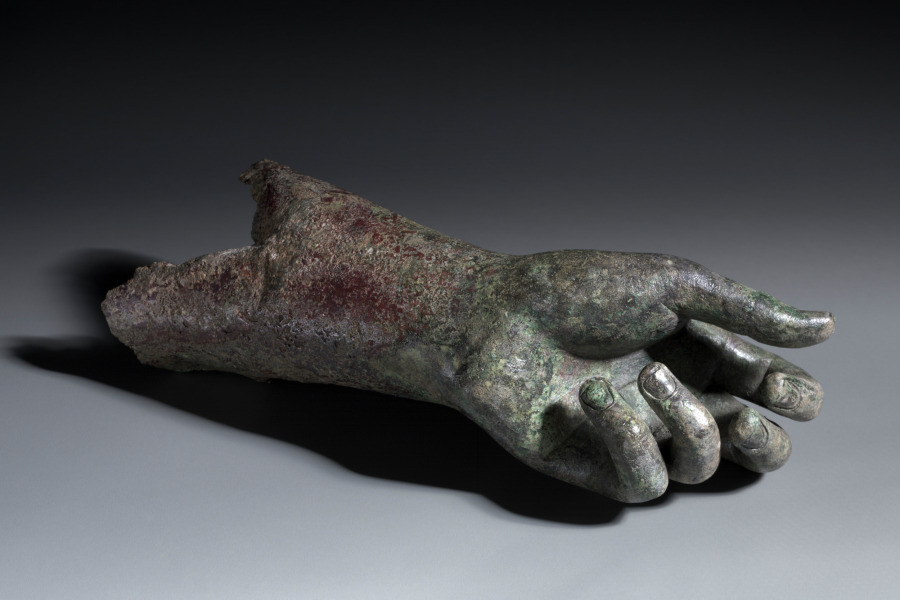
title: Detached Left Forearm and Hand of the Cleveland Apollo: Apollo Sauroktonos (Lizard-Slayer) or Apollo the Python-Slayer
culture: Greece, Athens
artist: attributed to Praxiteles (Greek, Athenian, c. 400–330 BCE)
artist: or Follower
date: c. 350–200 BCE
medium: bronze, copper and stone inlay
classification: Sculpture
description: Broken from the rest of the left arm some distance above the wrist, this fragment preserves much of the left forearm and the entire hand. The fingernails and folds of the palm are finely modeled, giving the hand a lifelike appearance. The positioning of the fingers and thumb suggests that the hand once gently grasped something, perhaps a slender branch of the now-lost tree.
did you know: The thumb and fingers are solid bronze, while the rest of this section is hollow.